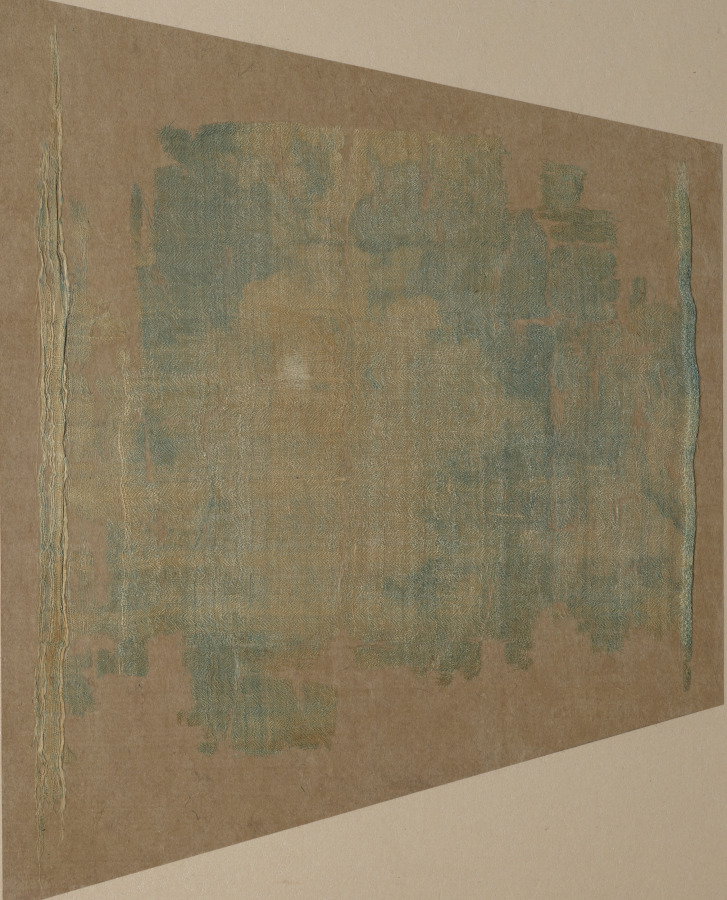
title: Fragment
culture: China, 8th century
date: 700s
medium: patterned tabby weave; silk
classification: Textile